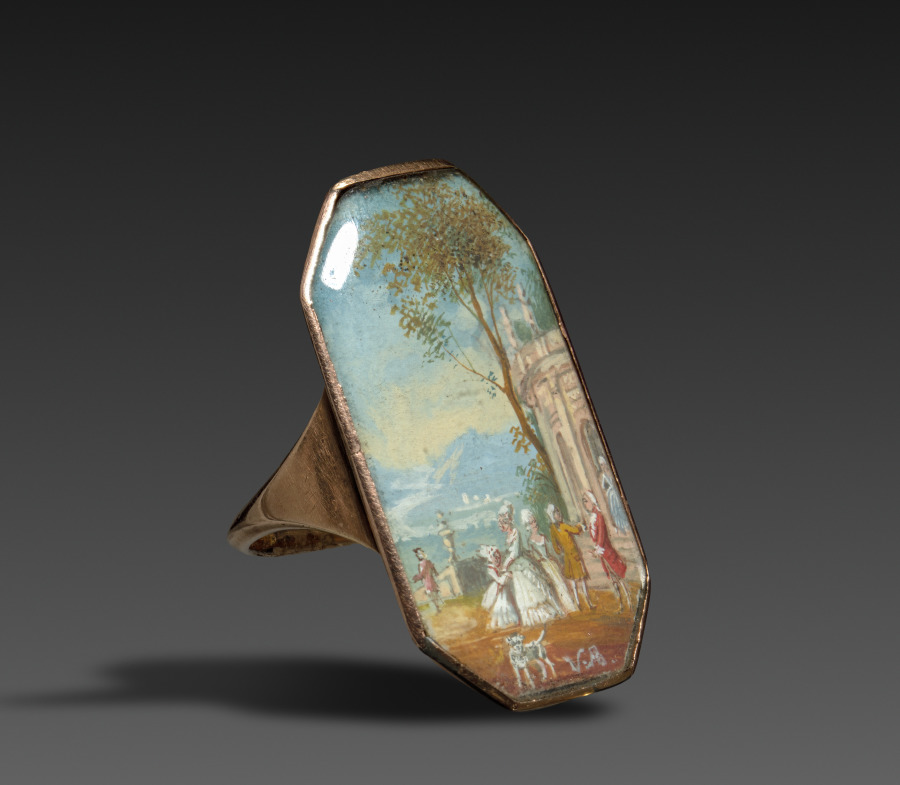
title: Miniature Ring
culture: France, 19th century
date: 1800s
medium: miniature mounted in gold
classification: Jewelry